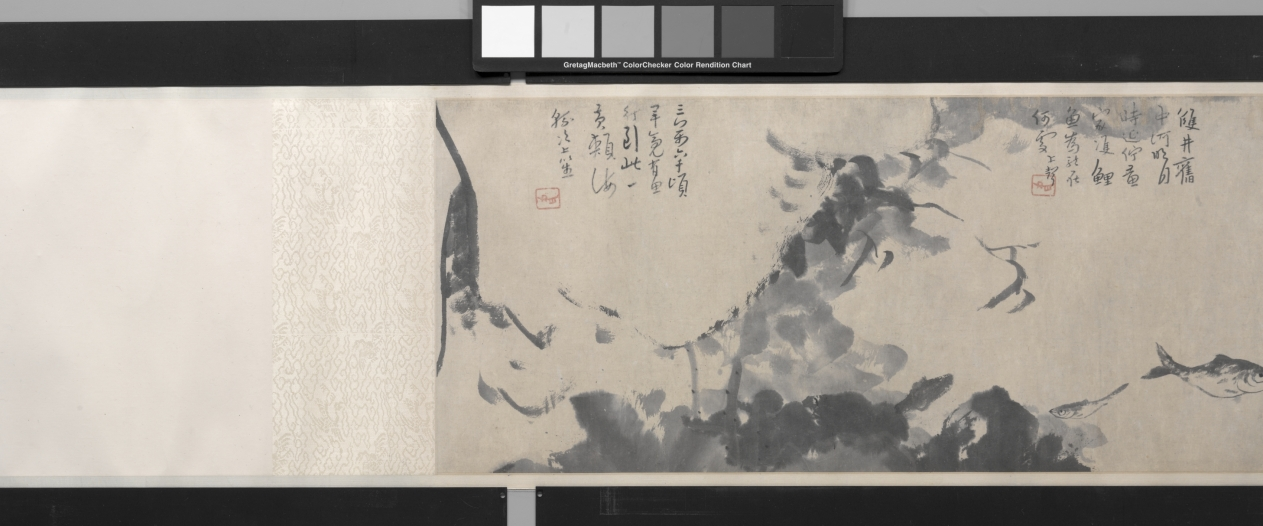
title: Fish and Rocks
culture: China, Qing dynasty (1644-1911)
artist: Bada Shanren (Chinese, 1626–1705)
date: mid- to late 1600s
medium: Handscroll; ink on paper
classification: Painting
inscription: 去天纔尺五，只見白雲行。 云何畫黃花，雲中是金城。 [印] 个山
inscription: 雙井舊中河，明月時延佇。 黃家雙鯉魚，為龍在何處。 [印] 个山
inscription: 三萬六千頃，畢竟有魚行。 到此一黃頰，海潮次上笙。 [印] 个山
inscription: 5 additional seals: 2 of Zhang Daqian 張大千 (1899–1983); 1 of Ta-an Chü-shih; 2 unidentified.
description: Bada Shanren, also called Zhu Da, a 17th-century painter who rejected conventions in favor of an individual, personal expression, is known for his unorthodox compositions of fish, flowers, birds, and rocks. Fish in his paintings are often looking upward toward heaven, swimming in a pond of undefined space. As a member of the Ming imperial family, Zhu Da lost his princely status and hid in a monastery when the Manchus, foreigners from the north, established the Qing dynasty in 1644. This scroll may have some autobiographical meaning, representing fish as leftover subjects (yimin) who lived in a void, having lost their roles in life after the fall of the dynasty.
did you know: After each poem, Bada Shanren used his so-called jixingyin seal 屐形印, which resembles the impression of a shoe on soft mud.